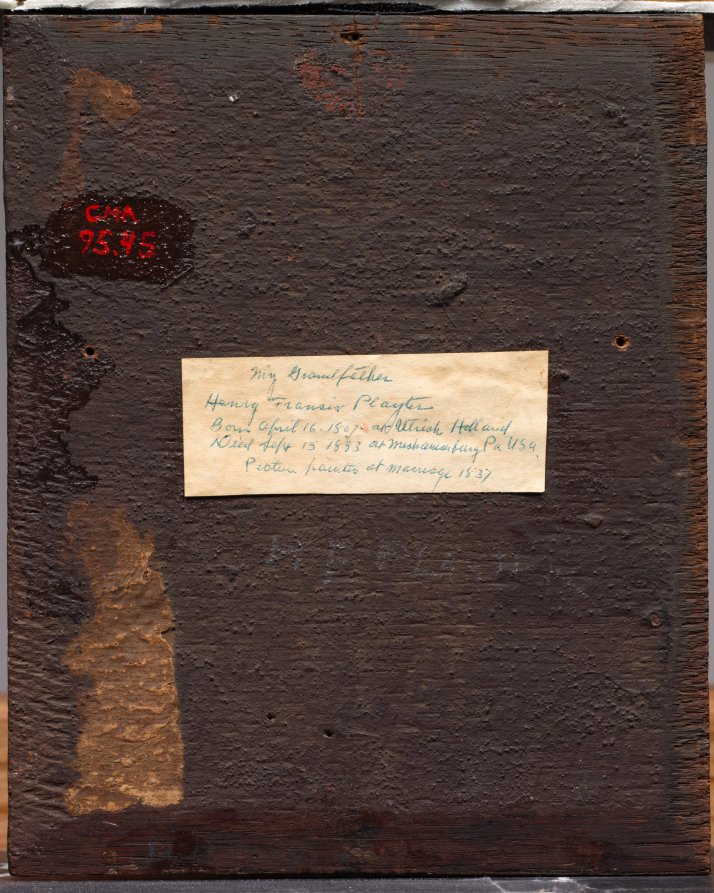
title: Henry Francis Playter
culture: Netherlands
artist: Pieter Christoffel Wonder (Dutch, 1780–1852)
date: c. 1837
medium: oil on wood panel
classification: Painting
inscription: Signed in brown paint in upper right corner: P.C.W. f